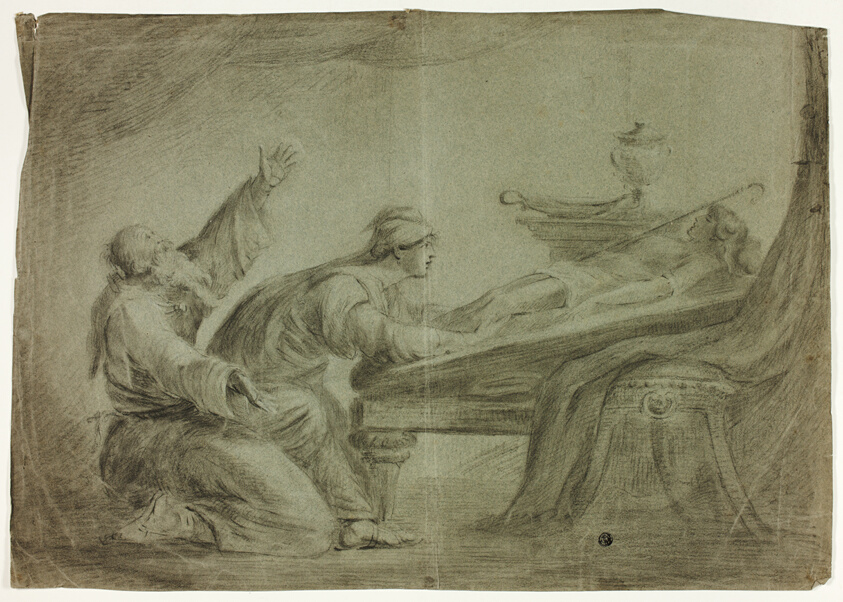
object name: Drawing and Watercolor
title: Couple in Antique Dress, Mourning Dead Son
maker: Unknown Artist; European or American, 18th century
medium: Charcoal, with stumping and touches of black chalk, on grayish-blue wove paper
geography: United States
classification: charcoal; paper; drawings (visual works); prints and drawing